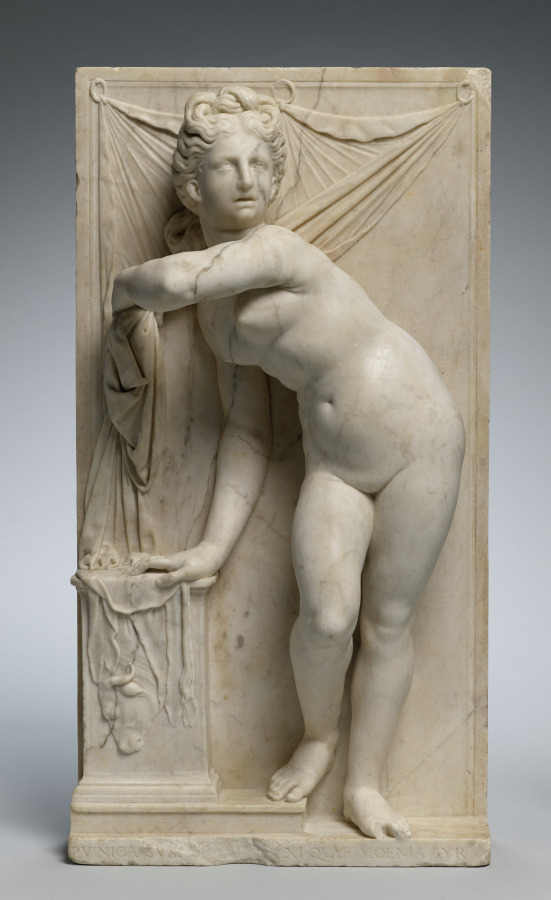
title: Dido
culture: Italy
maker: Aurelio Lombardo (Italian, 1501–1563)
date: c. 1525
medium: marble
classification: Sculpture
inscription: PVNICA SVM [DIDO ERE]XI QVAE MOENIA BYRSA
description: Artists customarily portrayed Dido as a forlorn lover abandoned by the Trojan hero, Aeneas, but here she is a conquering queen. Dido draws aside an oxhide curtain, a reference to the mythical founding of Carthage (in modern-day Tunisia, North Africa), when she was given an oxhide to demarcate granted land. By cutting it into thin strips she was able to encircle the future city. Dido was likely created for display in a studiolo, a place of study featuring refined works of art appreciated by humanist scholars and aficionados during the Renaissance.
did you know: Dido’s nudity and hairstyle are allusions to ancient Greek images of Aphrodite.